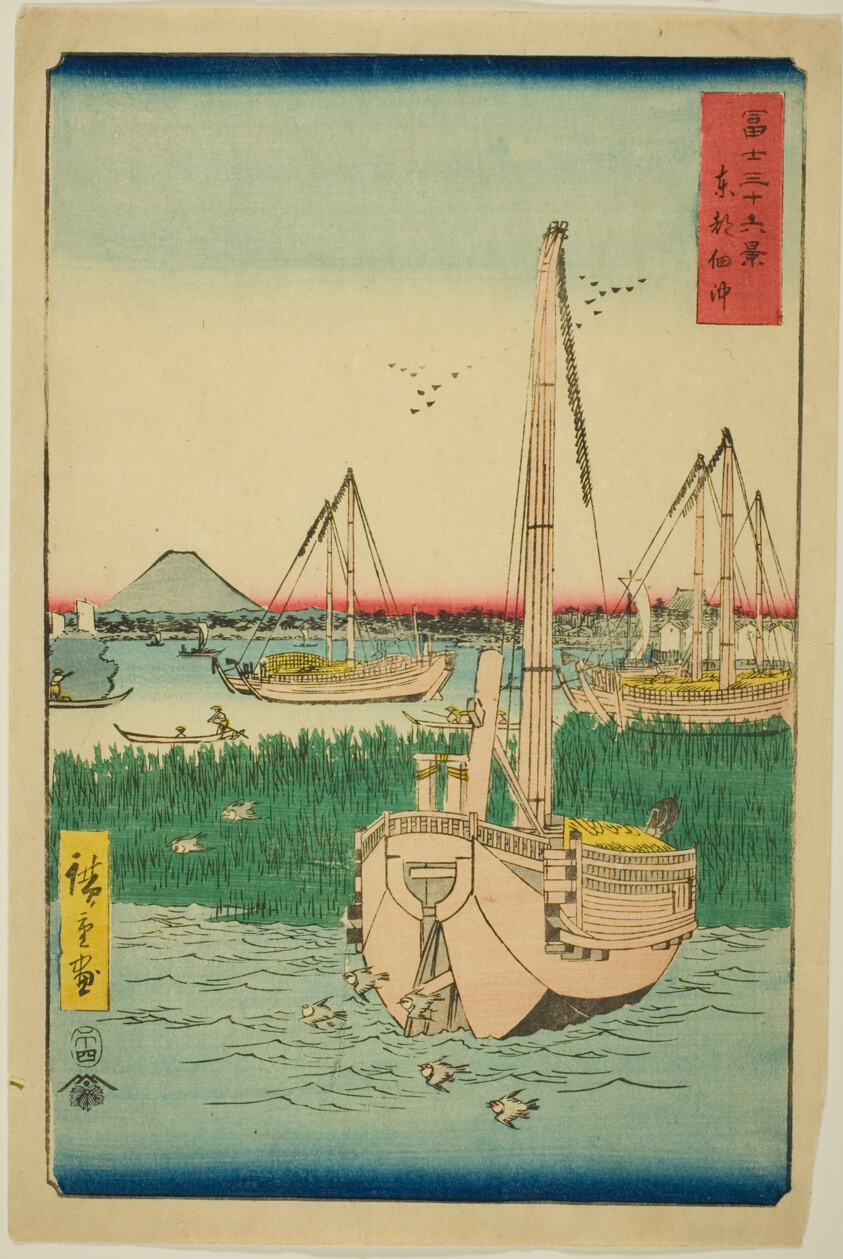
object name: Print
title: Off Tsukuda Island in the Eastern Capital (Toto Tsukuda oki), from the series "Thirty-six Views of Mount Fuji (Fuji sanjurokkei)"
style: edo (japanese period), Japanism, East Asian, asian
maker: Utagawa Hiroshige 歌川 広重; Japanese, 1797-1858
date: 1858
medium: Color woodblock print; oban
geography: Japan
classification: woodblock print; print; asian art